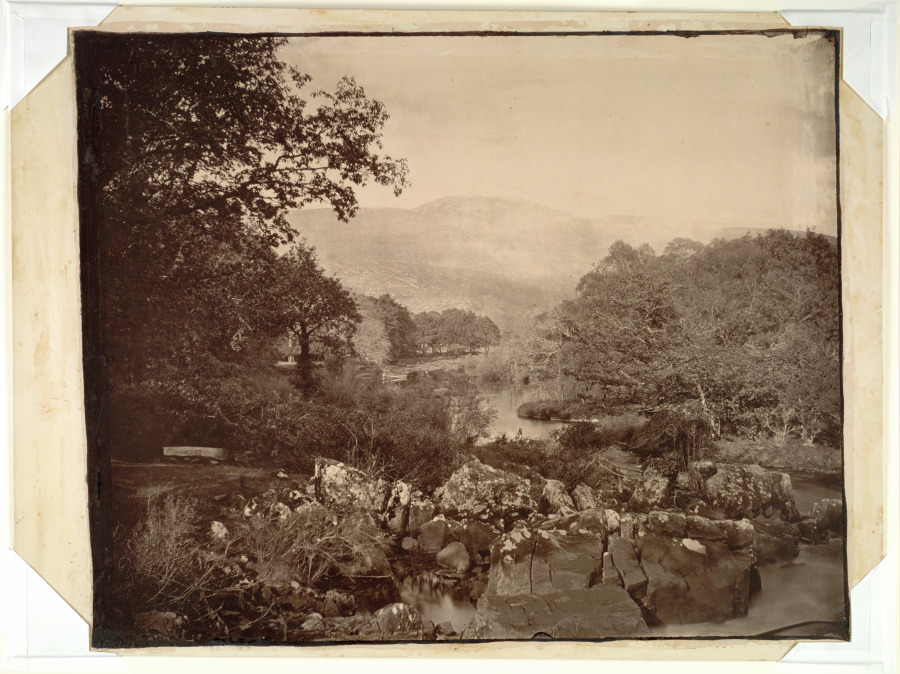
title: View from the Lawn, Dennicanniby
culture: England, 19th century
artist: Vernon Heath (British, 1819–1895)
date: 1870s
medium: carbon print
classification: Photograph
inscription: written in pencil on verso: "EC No7"; "Wilson"; in ink on verso: "View from Lawn. Dennicanniby. Killarney-S-"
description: A distinguished photographer who received royal patronage, Vernon Heath traveled extensively throughout the British Isles documenting estates and landscapes on commission. This carefully composed scenic view, taken just above the Upper Lake of Three Lakes of Killarney in southwest Ireland, exemplifies the pioneering technique he developed in the early 1860s for enlarging 12x10-inch glass negatives. Made when contact printing was the norm, Heath’s carbon-printed enlargements showed no distortion and preserved the general artistic effect, which brought praise from the photographic press. Through his outstanding ability to manipulate wet collodion plates in the field, he excelled at controlling light and rendering aerial perspective. Indeed, Heath was highly acclaimed for the pictorial detail and faithful description of the picturesque scenes his Victorian audience so admired. By 1871 the carbon pigment process was his preferred method for printing. It produced a softening effect and greater gradation of tone in his photographs while rendering them impervious to fading caused by natural light.